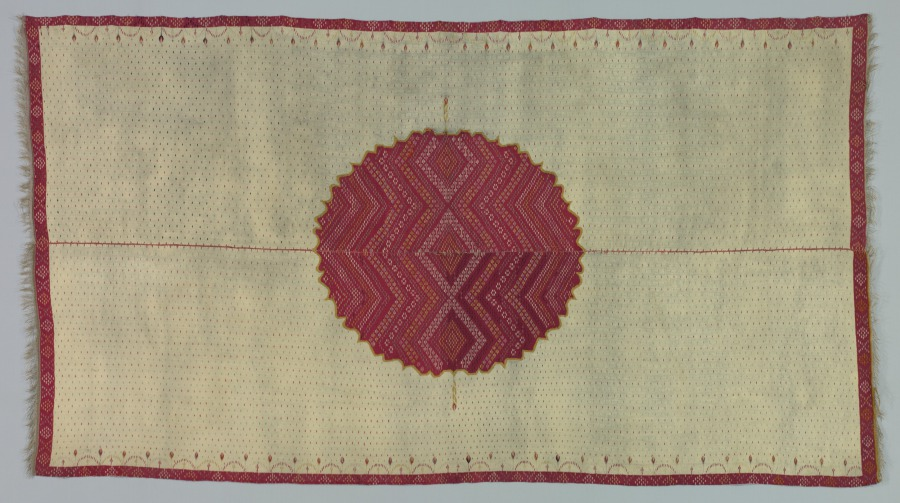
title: Sarape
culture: America, Native North American, Southwest, Mexico, Saltillo, Post-Contact, Late Classic Period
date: c. 1865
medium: tapestry weave: cotton and wool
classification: Textile